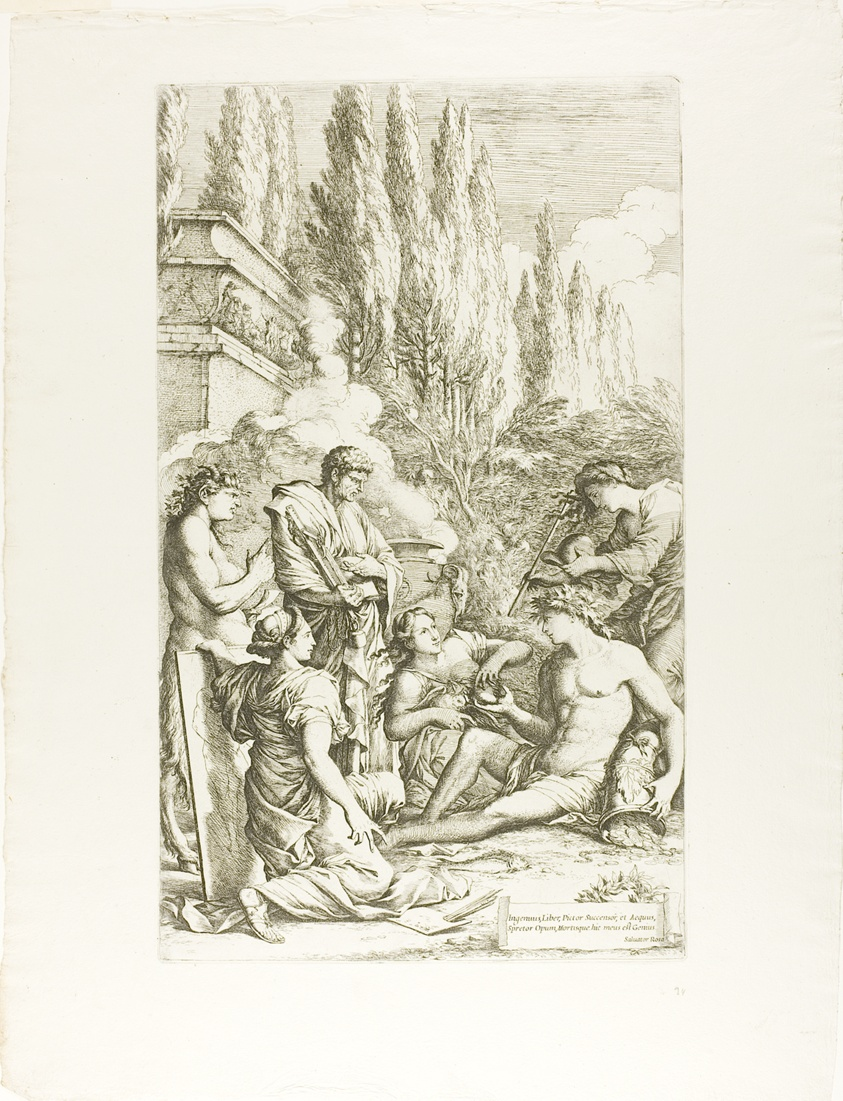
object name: Print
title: The Genius of Salvator Rosa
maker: Salvator Rosa (Italian, 1615-1673)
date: 1662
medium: Etching and drypoint on ivory laid paper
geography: Italy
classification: etching; print; prints and drawing